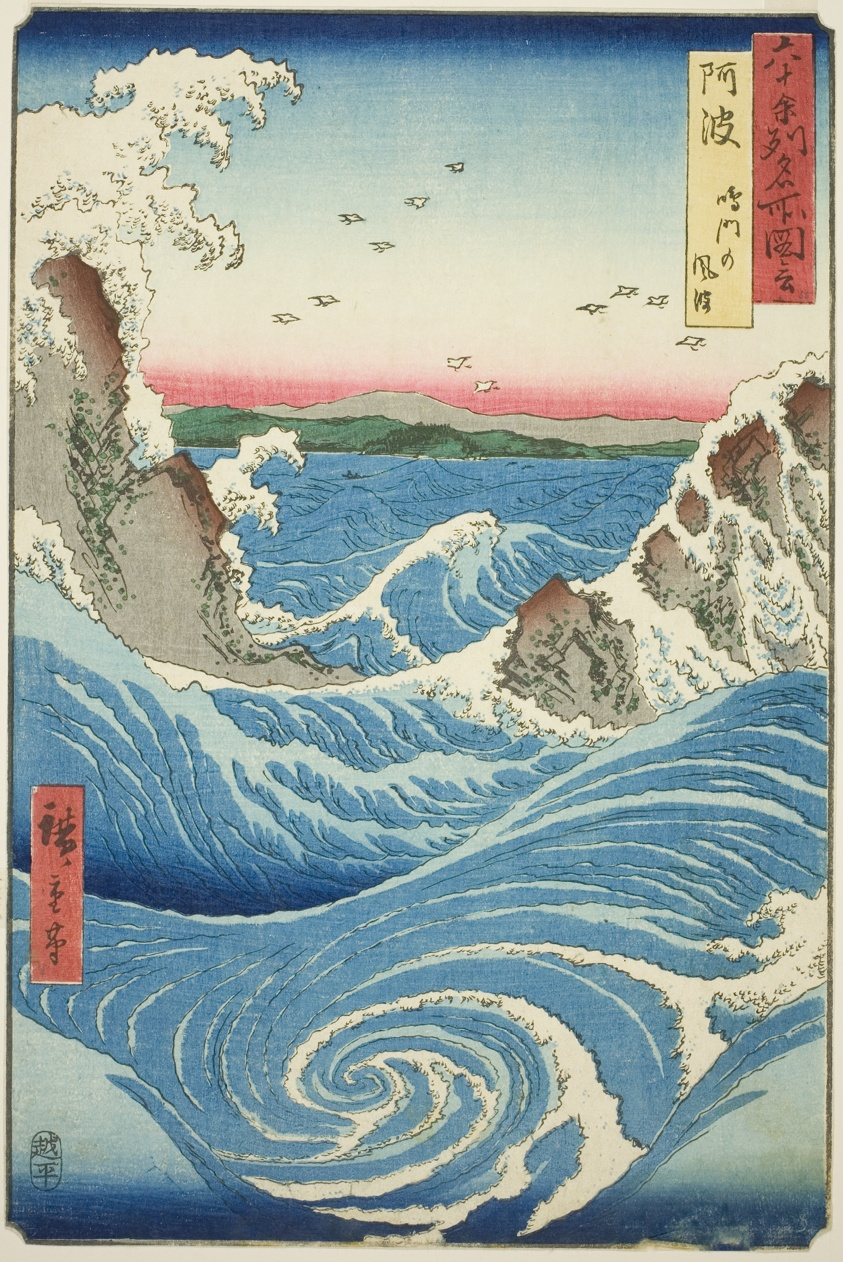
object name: Print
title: Awa Province: Naruto Whirlpools (Awa, Naruto no fuha), from the series "Famous Places in the Sixty-odd Provinces (Rokujuyoshu meisho zue)"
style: Japanese (culture or style)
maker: Utagawa Hiroshige 歌川 広重; Japanese, 1797-1858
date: 1855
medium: Color woodblock print; oban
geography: Japan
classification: woodblock print; print; asian art